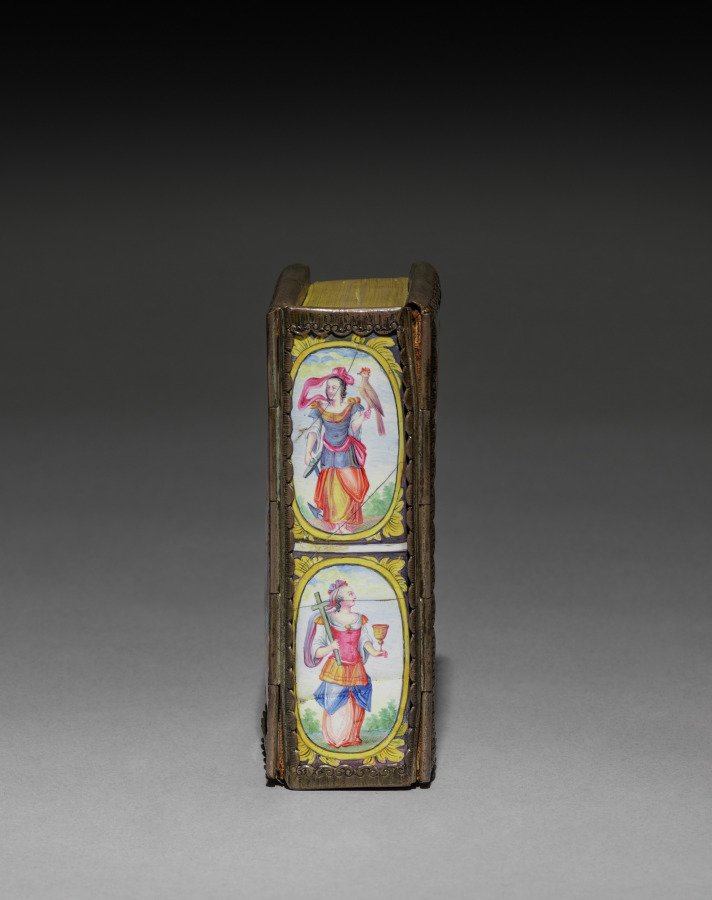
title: Carnet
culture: Sweden, 19th century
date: 1863–1865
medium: enamel on copper and silver gilt book binding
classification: Miscellaneous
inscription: inside is psalm book written in German, with handwritten dedication on cover, dated 25 May 1865.